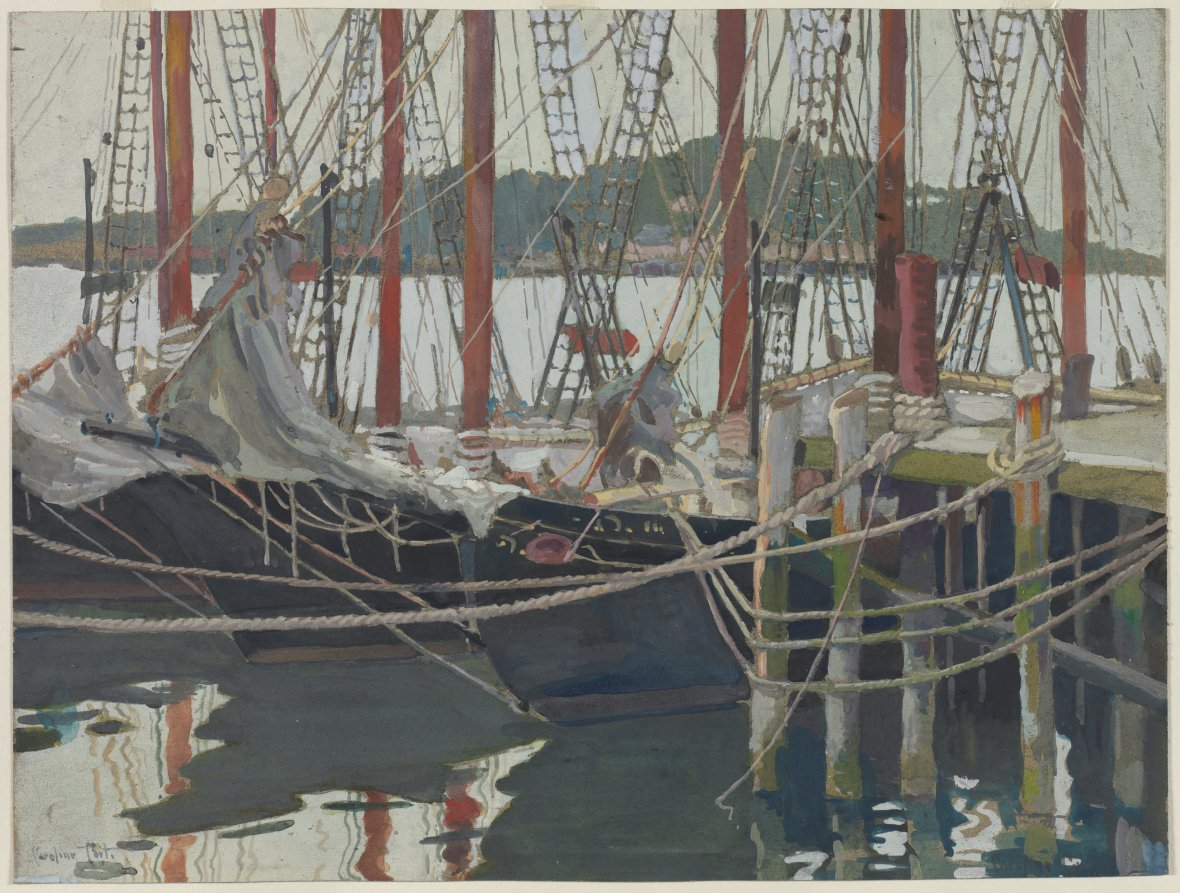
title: Idle Days, Gloucester, Massachusetts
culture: America, Ohio, Cleveland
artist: Caroline E. Coit (American, c. 1860–1934)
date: c. 1920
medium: watercolor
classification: Drawing